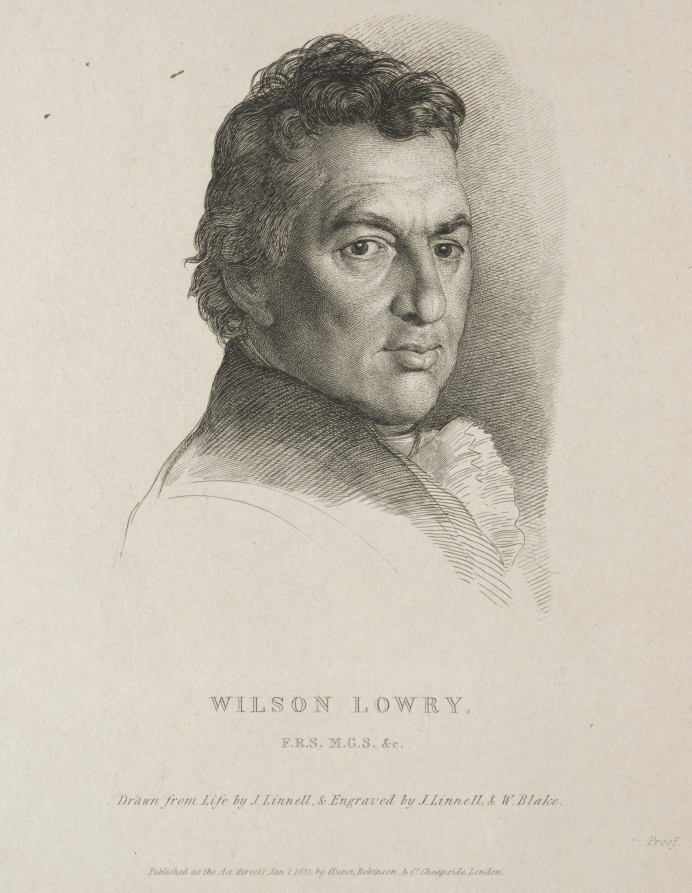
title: Wilson Lowry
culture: England, 19th century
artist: William Blake (British, 1757–1827)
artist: and John Linnell (British, 1792–1882)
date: 1825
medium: engraving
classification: Print